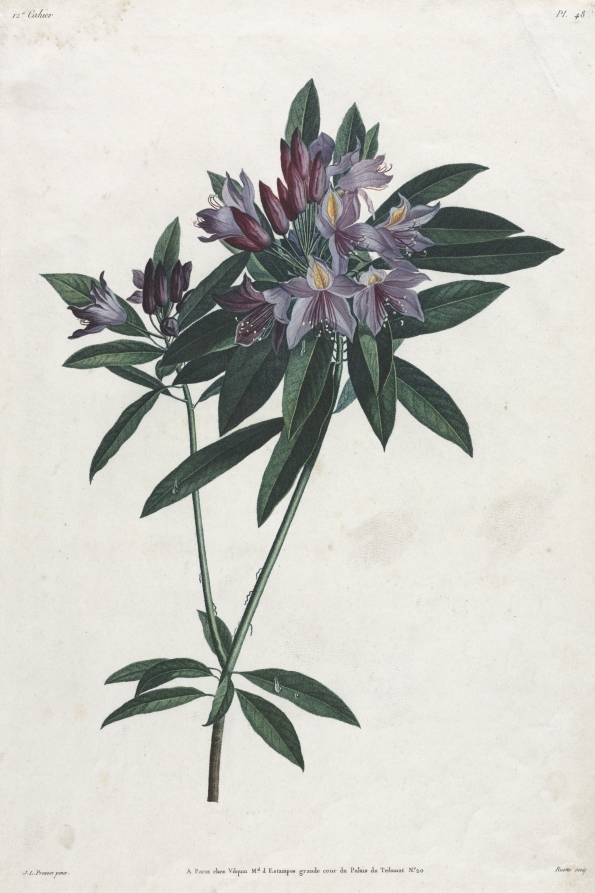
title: Pontic Rhododendron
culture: France, late 18th-early 19th Century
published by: Jean Louis Prévost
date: 1805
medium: stipple and roulette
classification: Print